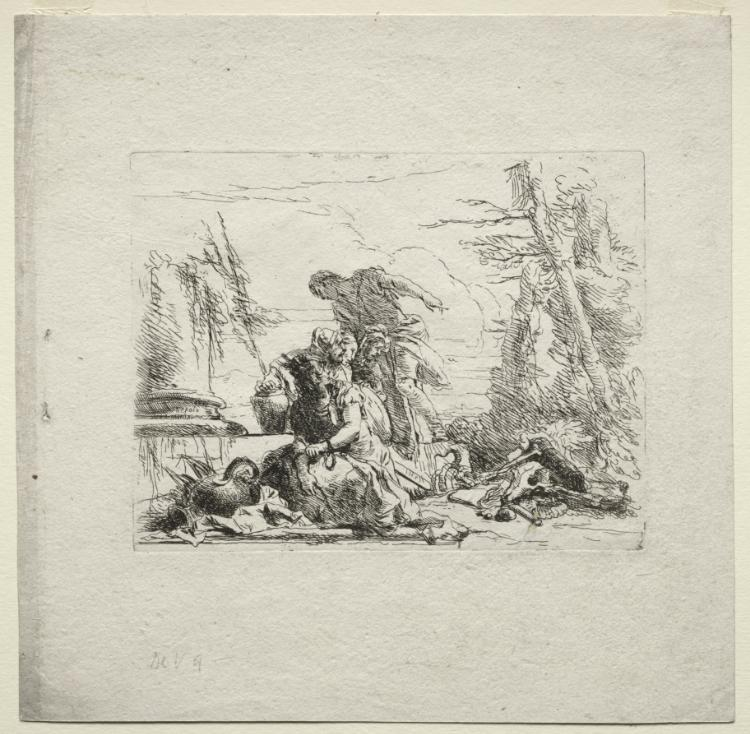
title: Various Caprices: The Woman in Handcuffs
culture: Italy, 18th century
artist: Giovanni Battista Tiepolo (Italian, 1696–1770)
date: 1735–50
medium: etching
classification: Print